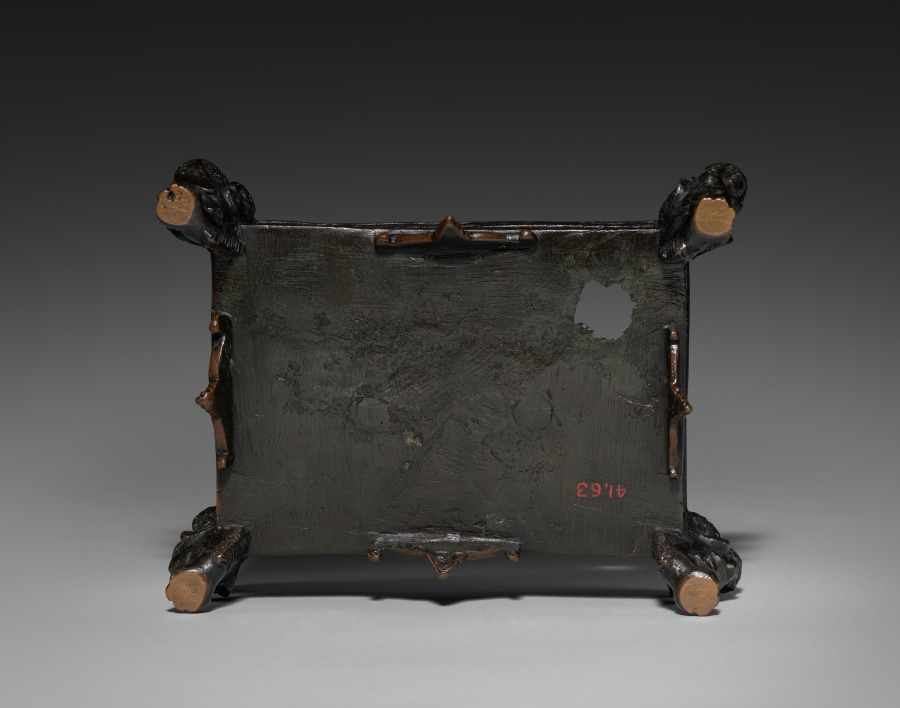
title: Writing Casket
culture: Italy, Ravenna, 16th century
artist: workshop of Severo da Ravenna (Italian, c.1496–c.1543)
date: c. 1525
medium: bronze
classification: Sculpture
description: The interior is divided into four compartments for storing writing implements and sand for blotting.